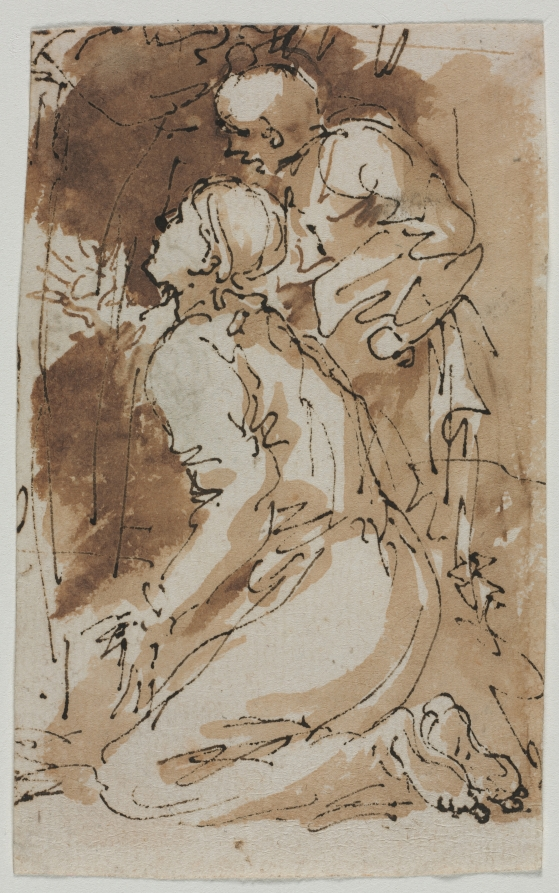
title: Figure Studies (recto)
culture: Italy, 17th century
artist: Salvator Rosa (Italian, 1615–1673)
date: c. 1640–1649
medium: pen and brown ink and wash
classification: Drawing